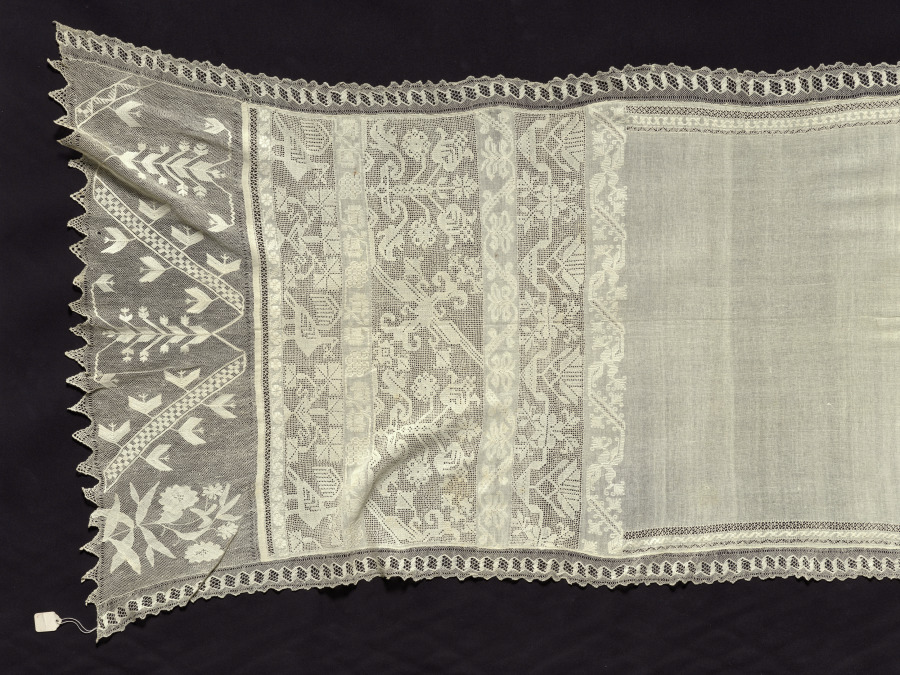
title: Cloth with Border of Vegetal Motifs and Insertion with Bird Motifs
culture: Cyprus ?, 1700s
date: 1700s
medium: Plain weave wool with needle lace, burato insertion (twined ground and darned in two directions), filet/lacis border and edging (knotted ground and darned in one direction), drawn work, and embroidery; bleached linen (est.), wool (est.), and cotton (est.)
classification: Lace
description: Textiles often incorporate multiple needlework techniques within a single piece. One of the techniques in this example of lace is called cutwork. In cutwork, portions of the textile ground, such as a linen or cotton cloth, are cut away and threads are removed to create holes. The edges of the hole are then reinforced with embroidery and a pattern of needle lace can be created within the perimeter. Rather than adding to the cloth to create a design, the craftsperson removes threads to fabricate a pattern.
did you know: This lace was given to the museum by Louise Tifft Brown, a native Clevelander who became an expert in lace while living in Venice for 35 years.